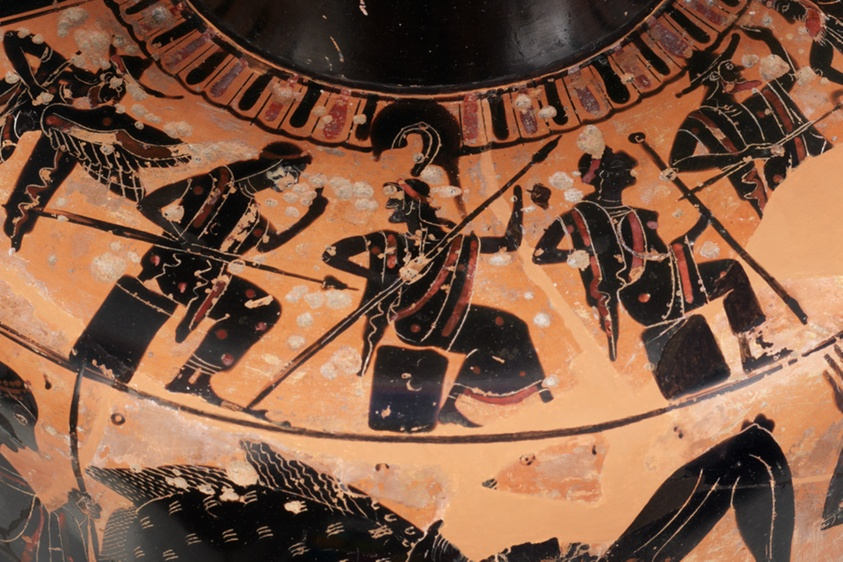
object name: Vessel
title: Hydria (Water Jar)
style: archaic (greek), attic, black-figure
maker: Attributed to a painter of the Leagros group; Greek; Athens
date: about 515-500 BCE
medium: terracotta, black-figure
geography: Athens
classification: vessel; earthenware; ceramics; ancient art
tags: mythological figures, drinking, Heracles, Aphrodite